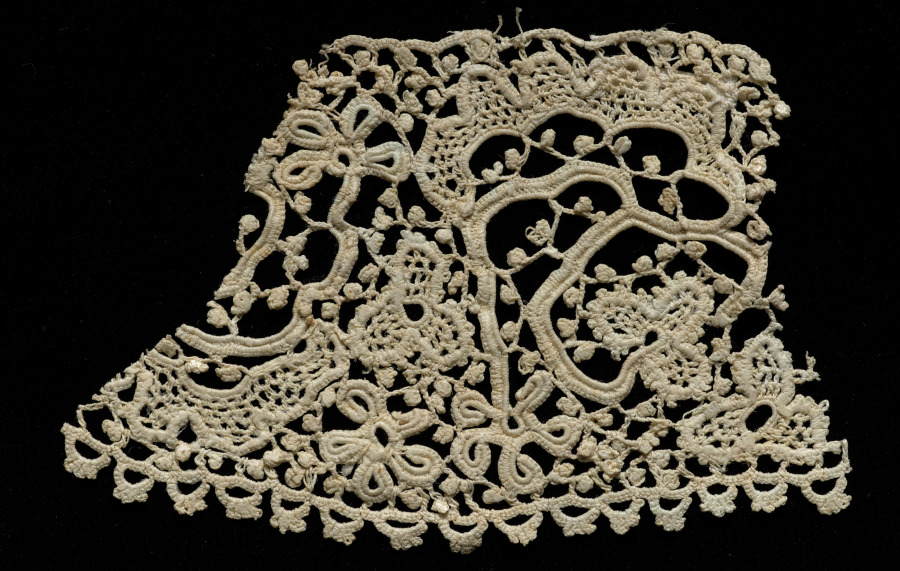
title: Lace Fragment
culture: Ireland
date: 1800s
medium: Cotton: crocheted lace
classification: Lace